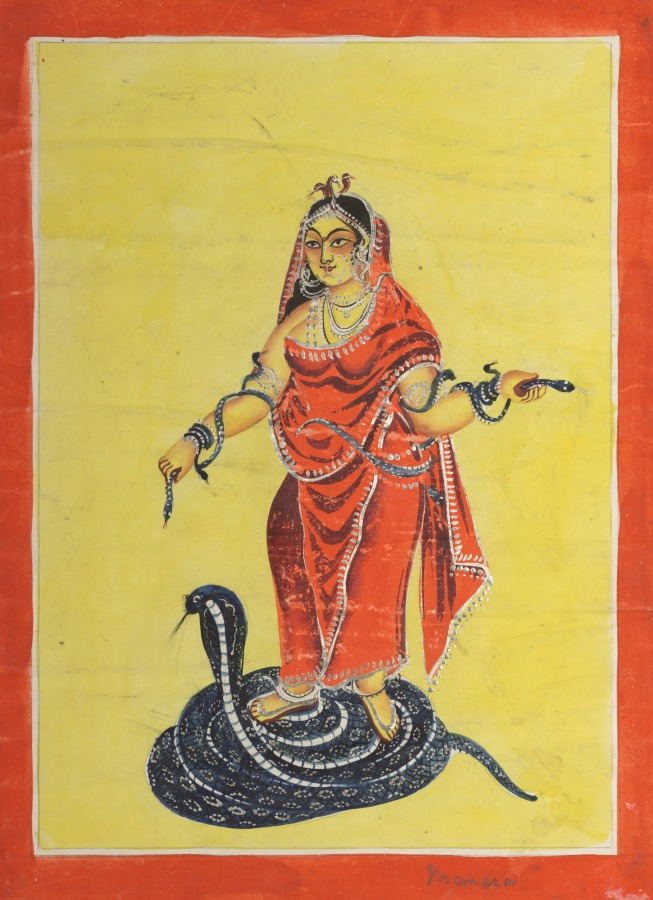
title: Manasa, The Snake Goddess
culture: Eastern India, Bengal, Kolkata, Kalighat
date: c. 1890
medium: Gum tempera, graphite, ink, and tin on paper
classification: Painting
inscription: [[in margin]] Manasa